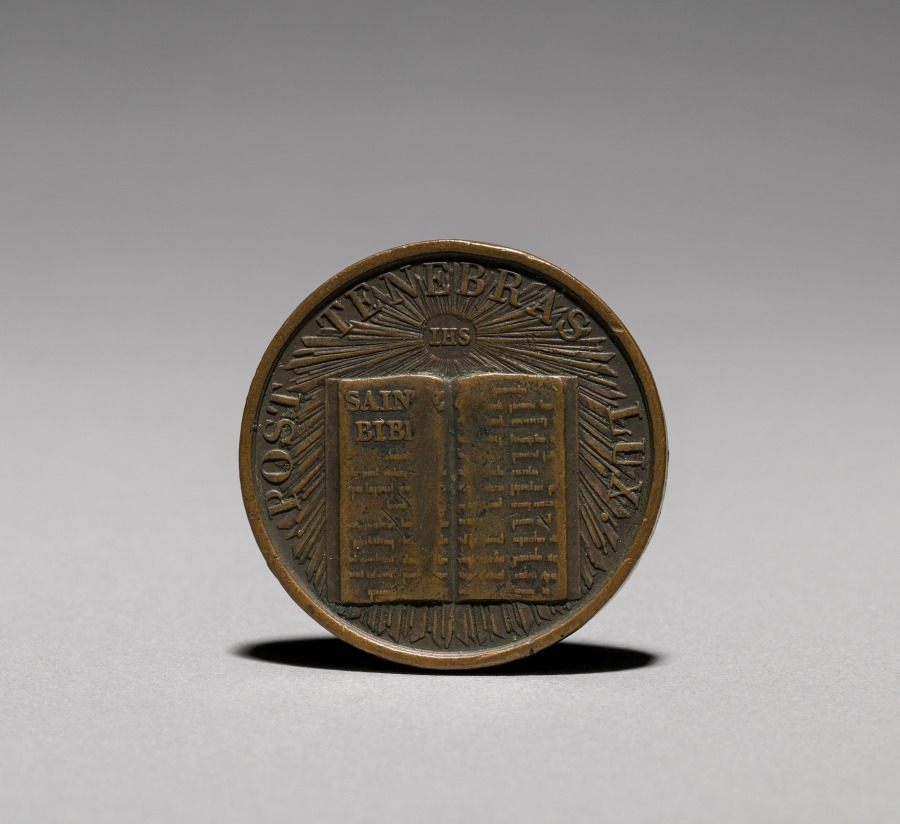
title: Medal: Commemorating 3c Jubilé de la Reformation Genève 23 Aôut 1835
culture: France ? or Switzerland ?, 19th century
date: 1835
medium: bronze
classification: Metalwork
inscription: Post tenebras lux lux I.H.S. Saint Bibi (last letter effaced).